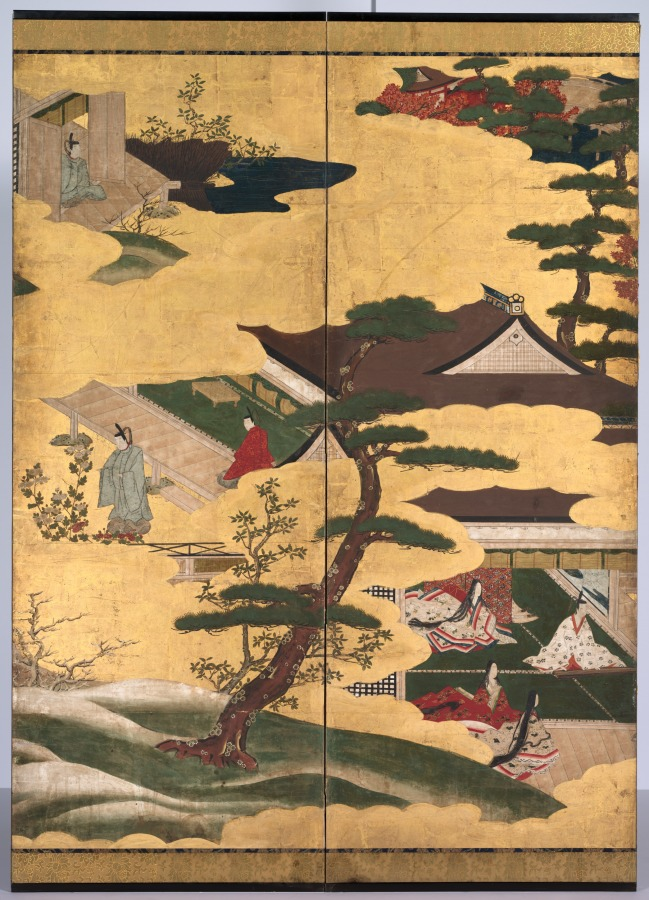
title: Scenes from the Tale of Genji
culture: Japan, Edo period (1615–1868)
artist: Tosa School (Japanese)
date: late 1700s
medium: One of a pair of six-panel folding screens; ink, color, and gold on gilded paper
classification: Painting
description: Folding screens served as temporary dividers in traditional Japanese open-plan architectural spaces. This pair was inspired by Japan’s most celebrated work of literature, the Tale of Genji, written by Murasaki Shikibu, an attendant to the empress in the early 11th-century imperial court. The novel follows the love life of the “Shining Prince” Genji and delves into the psychological states of his many companions. Distinct episodes are nestled within a matrix of golden clouds and landscape elements. Each screen includes six episodes presented in a nonlinear fashion, capturing scattered highlights of the story.